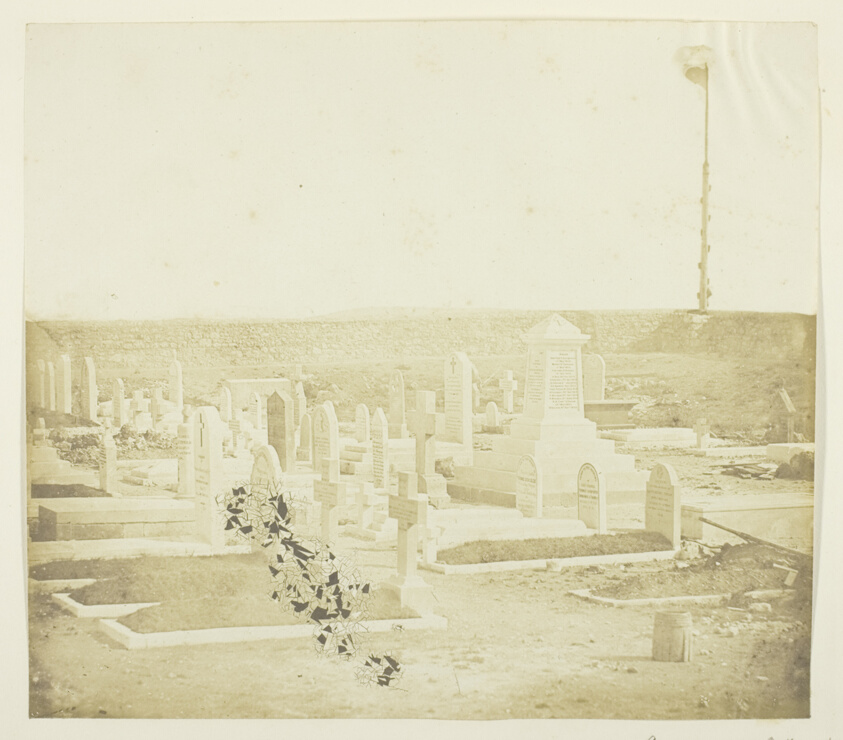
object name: Photograph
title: Cemetery on Cathcart's Hill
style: 19th century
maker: James Robertson (Scottish, c. 1813–d. after 1881)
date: 1855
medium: Albumen print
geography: Scotland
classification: unidentified; photography; photograph